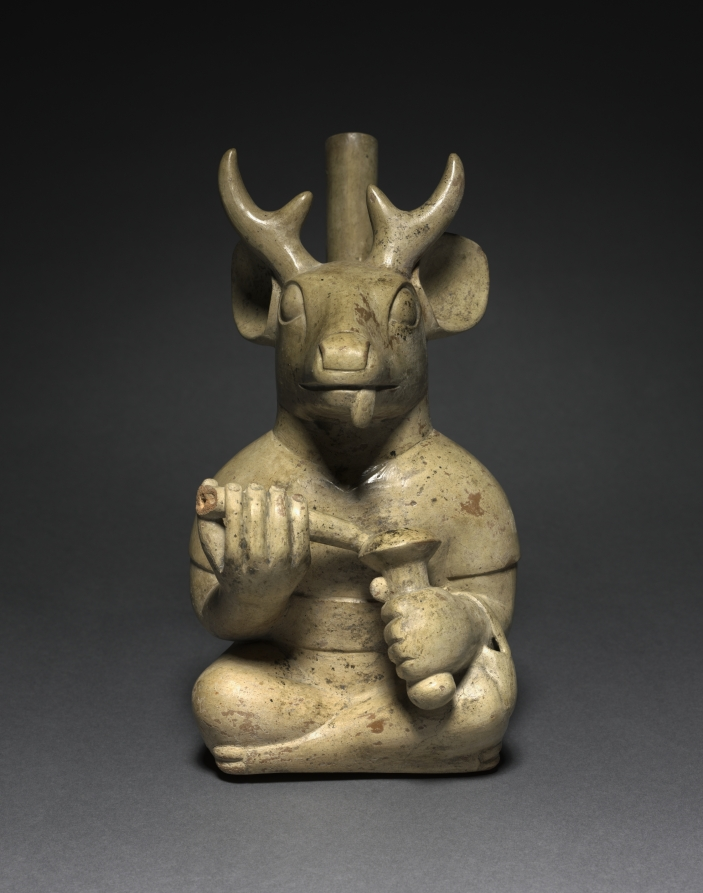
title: Deer-Headed Figure Vessel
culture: Central Andes, North Coast, Moche people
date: 200–850 CE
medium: ceramic, slip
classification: Vessels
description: Moche imagery includes an intriguing world of creatures that mingle traits from different realms: beans sprout human legs and race up a spout, jars leap with human feet to pour themselves, and animals wield weapons in two hands. This figure, with a stag’s head but a human’s body, is an example. He is engaged in a coca-leaf chewing ritual and thus holds a bag for the leaves along with a container of powdered lime that is one of the ritual’s key ingredients.